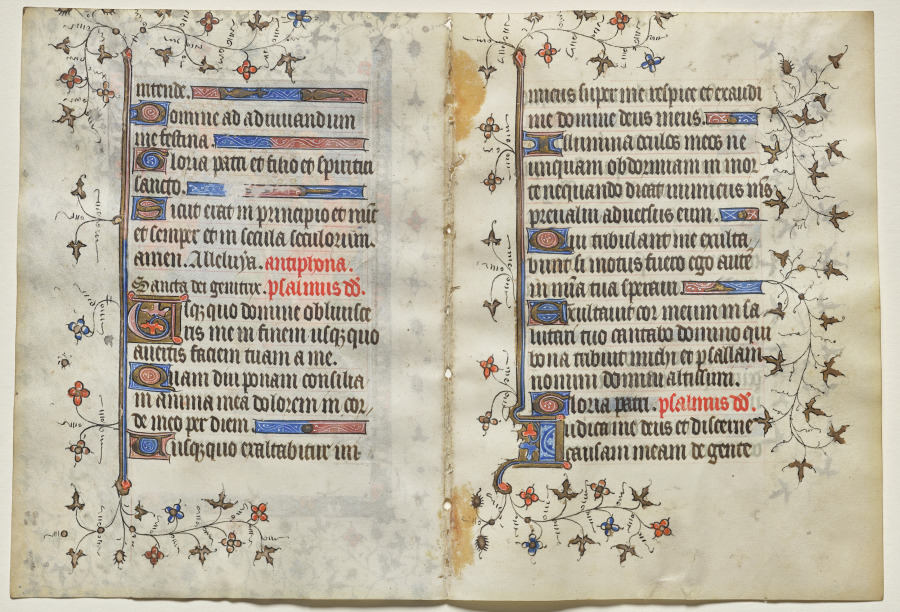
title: Bifolio from a Book of Hours: Text (verso)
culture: France, Paris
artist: workshop of Boucicaut Master (French, Paris, active about 1410–25)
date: c. 1415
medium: ink, tempera, and gold on vellum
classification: Manuscript